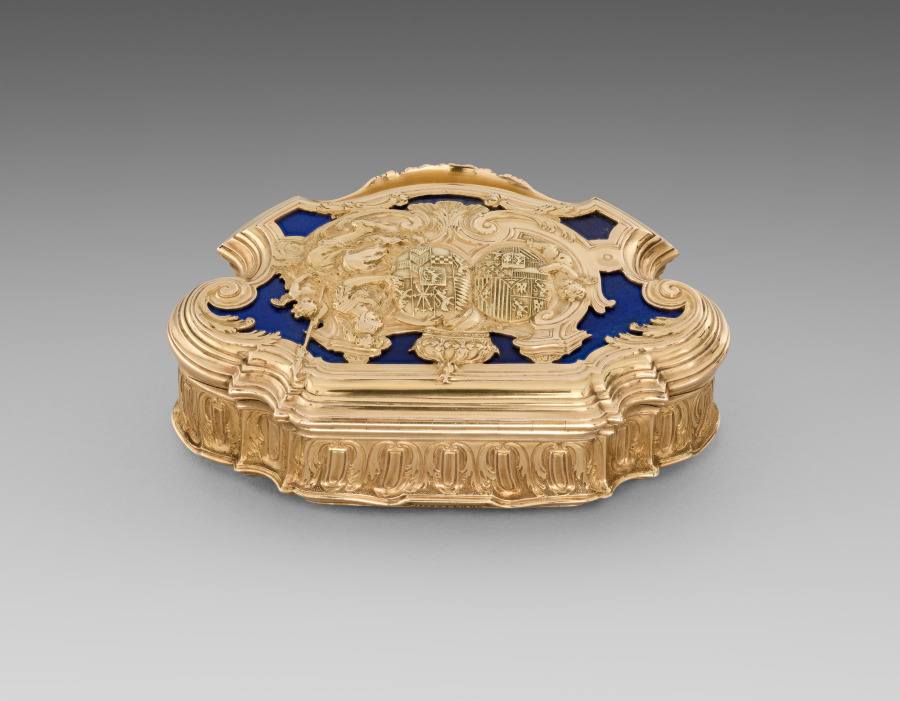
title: Gold Box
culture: France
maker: Juste-Aurèle Meissonnier (French, 1695–1750)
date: 1728–29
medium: gold and lapis lazuli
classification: Metalwork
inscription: IOM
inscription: a crowned M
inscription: a crowned dolphin's head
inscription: a crowned chancellor's mace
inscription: double frame eagle's head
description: With its central cartouche, heavy molding, and fluted sides, the design of this box attests to Juste-Aurèle Meissonnier’s interest in architecture. The box is further distinguished by a strong sense of movement, achieved through its dynamic contour, extraordinary level of detail, and the dramatic contrast between gold and lapis lazuli. Such small boxes, known as snuffboxes, were used to hold scented powdered tobacco that was inhaled through the nostrils. Made of precious materials and highly ornamented, they conveyed the owner’s wealth, fashion awareness, sophistication, and social standing. These personal, collectible items were often presented as luxurious gifts. This box was made for the dowager Queen of Spain, Maria Anna of Neuburg, whose coat of arms – along with that of her late husband, Charles II – features on the cover.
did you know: This is one of the two known objects that bear the maker's mark of Meissonnier.